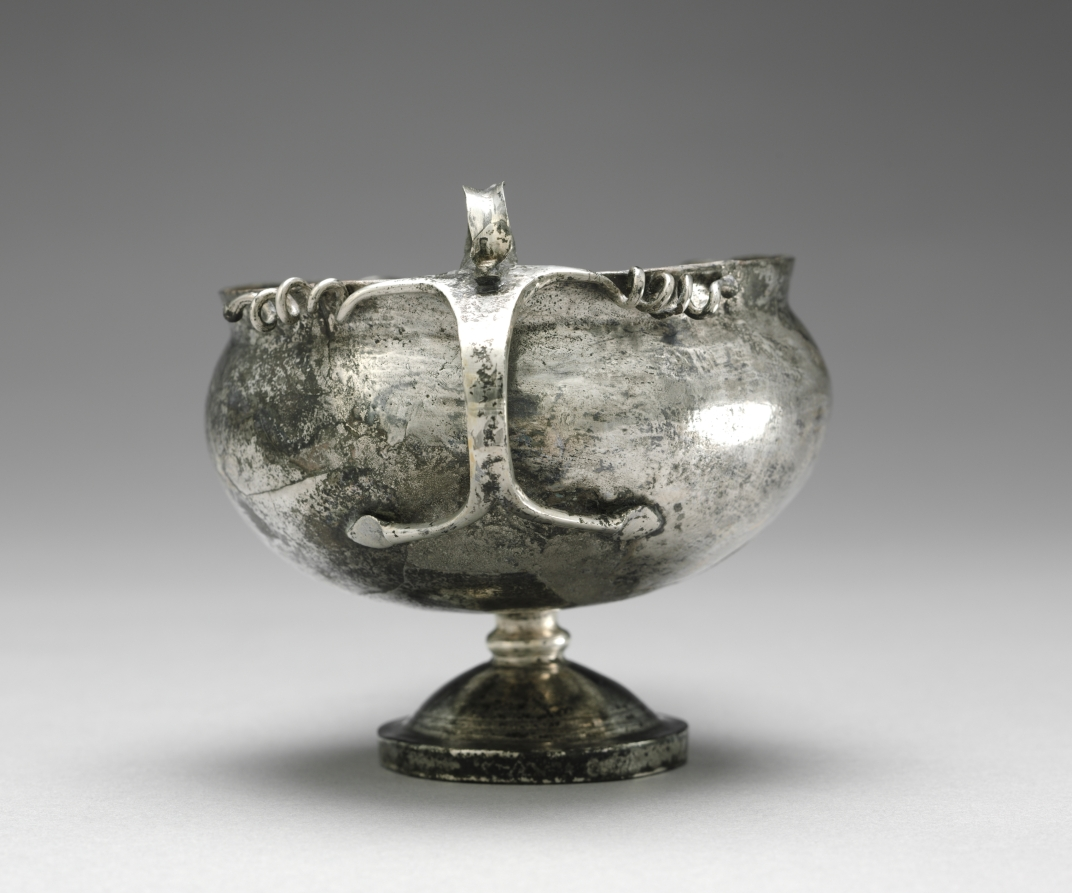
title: Spouted Pitcher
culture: Byzantium, Syria(?), Byzantine period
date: 300–600 CE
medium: silver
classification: Metalwork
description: A large quantity of tableware survives from the Roman Empire, including this piece from Antioch and the Eastern Mediterranean. Most of the recovered groups of silver seem to have been hoards concealed during times of trouble. A complete table service, called a ministerium in Latin and a synthesis in Greek, consisted of silver for eating and drinking: trays, platters, plates, dishes, spoons, pepper dispensers, goblets, pitchers, ladles, and bowls. The god of wine, Dionysos, was frequently depicted on drinking and eating vessels.